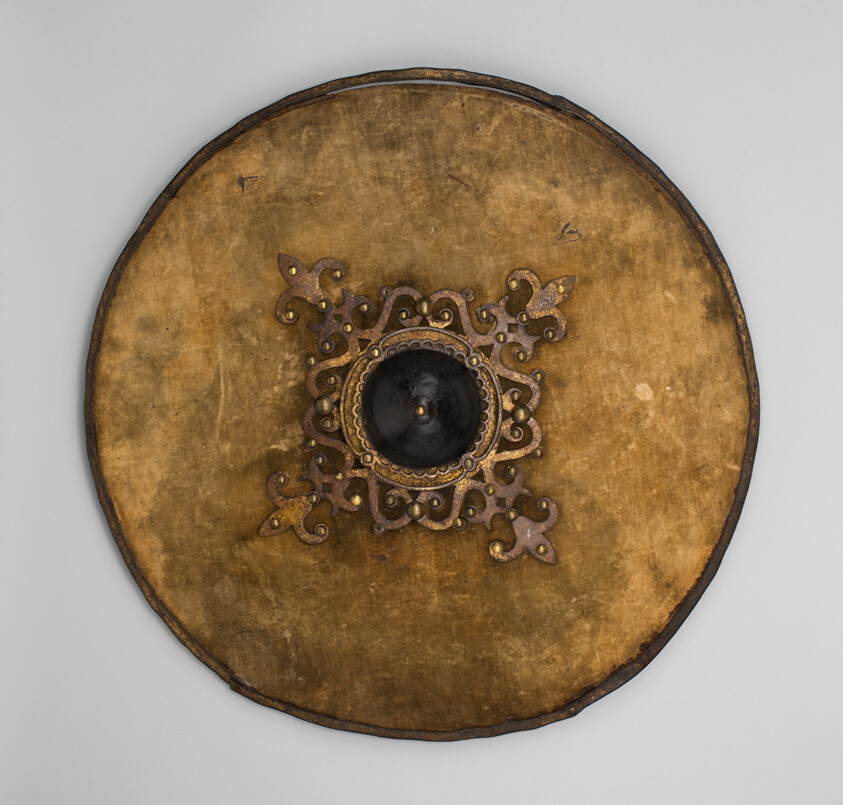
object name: Armor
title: Buckler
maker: Italian or Spanish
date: 1630/50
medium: Wood, iron, brass, gilding, silk velvet, and silk damask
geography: Italy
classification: shield; armor; arms and armor